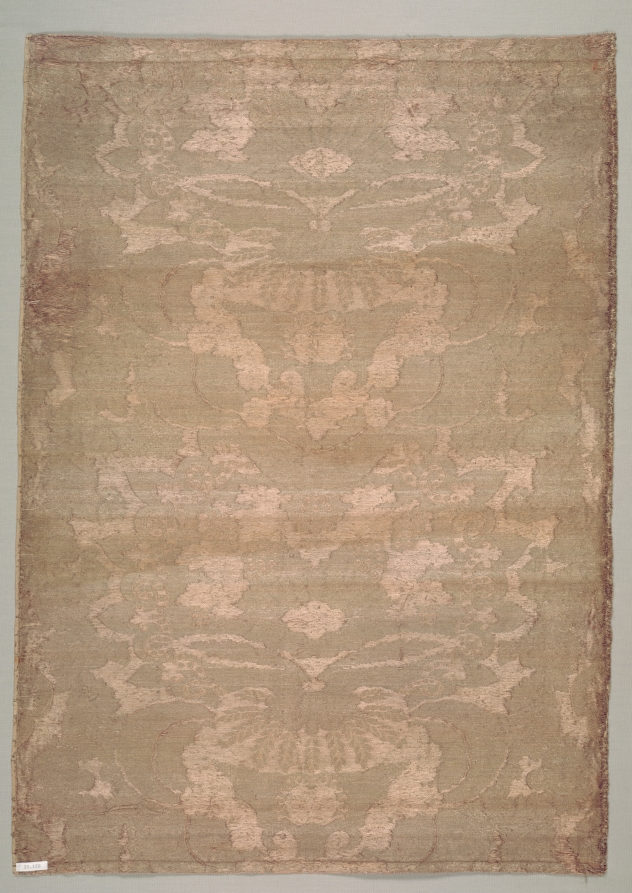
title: Textile Fragment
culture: France, early 18th century, late Baroque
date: early 1700s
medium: plain compound satin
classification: Textile